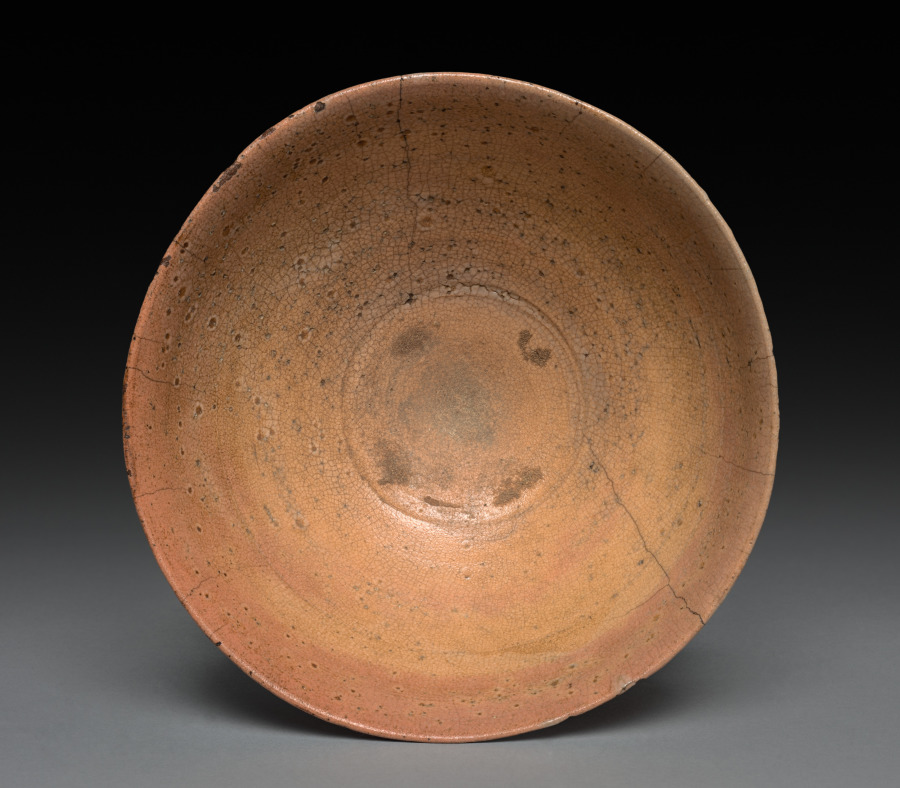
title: Tea Bowl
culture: Japan, Momoyama period (1573–1615)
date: c. 1600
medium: Glazed stoneware (Karatsu ware)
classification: Ceramic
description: Wide-mouthed bowls were used for consuming whipped tea such as that imbibed during the tea ceremony. Karatsu ware like this was among the most prized of such tea bowls. The port city of Karatsu in Saga prefecture in Kyushu was known for its kilns that produced high-fired, Korean-style glazed pottery. The Japanese ruler Toyotomi Hideyoshi invaded Korea in 1592 and 1597, returning with families of Korean potters as spoils of war. This region was one of the sites where these potters were resettled.